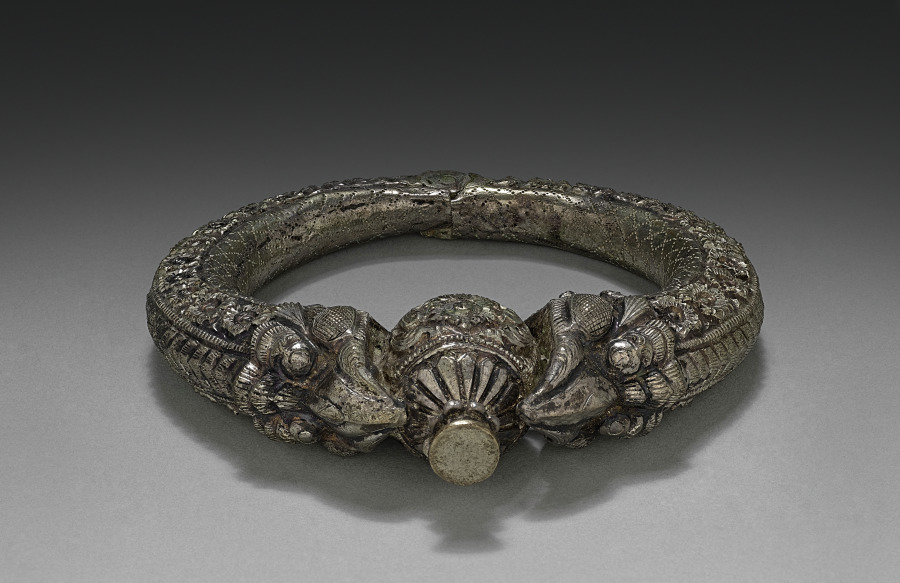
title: Bracelet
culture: Burma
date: 1800s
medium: silver gilt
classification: Jewelry